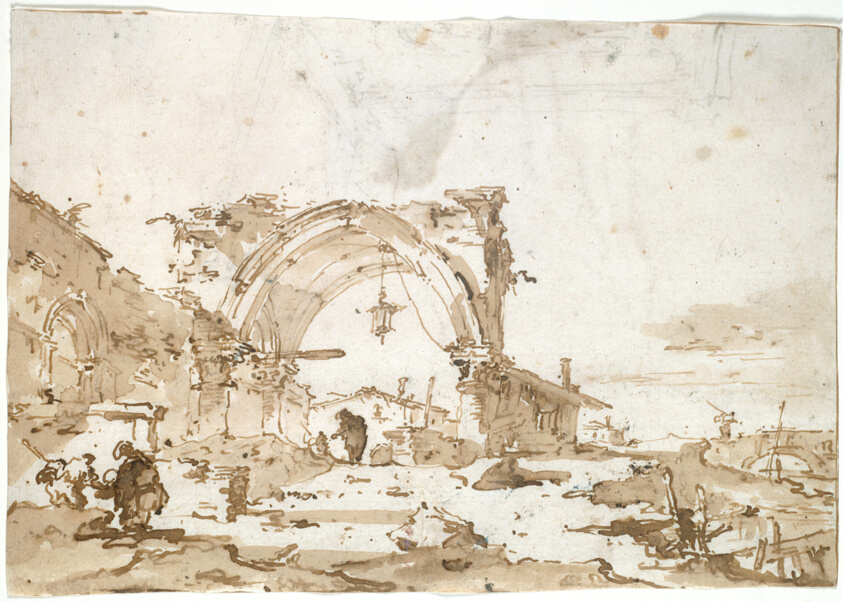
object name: Drawing and Watercolor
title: A Capriccio with a Ruined Gothic Arch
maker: Francesco Guardi (Italian, 1712-1793)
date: 1770/89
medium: Pen and brown ink, and brush and brown wash, over traces of black chalk on ivory laid paper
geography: Italy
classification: pen and ink drawings; drawings (visual works); prints and drawing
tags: landscapes, prints and drawings